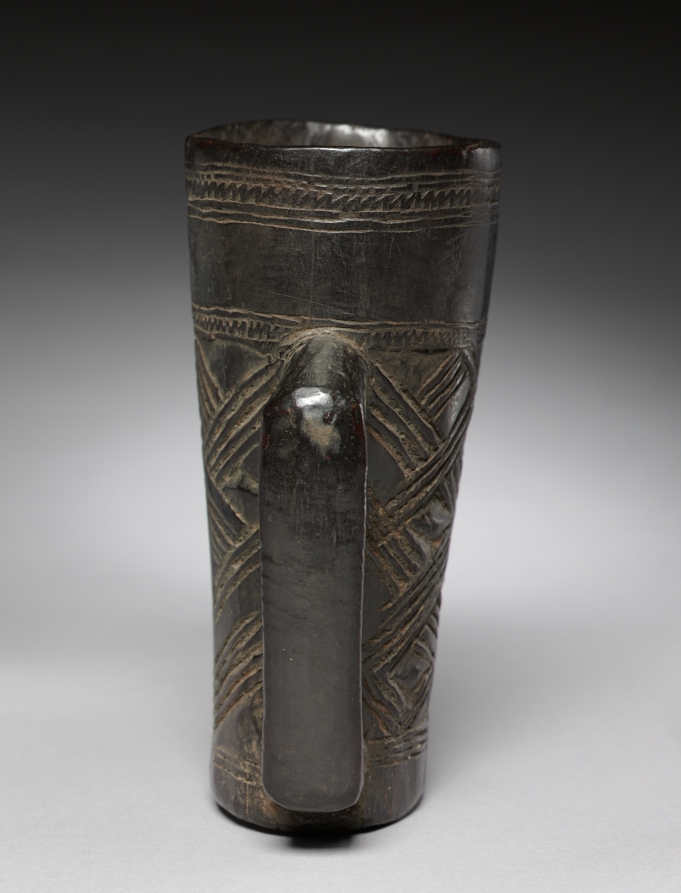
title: Cup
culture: Central Africa, Democratic Republic of the Congo, Bushoongo, 20th century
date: 1900s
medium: Wood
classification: Vessels